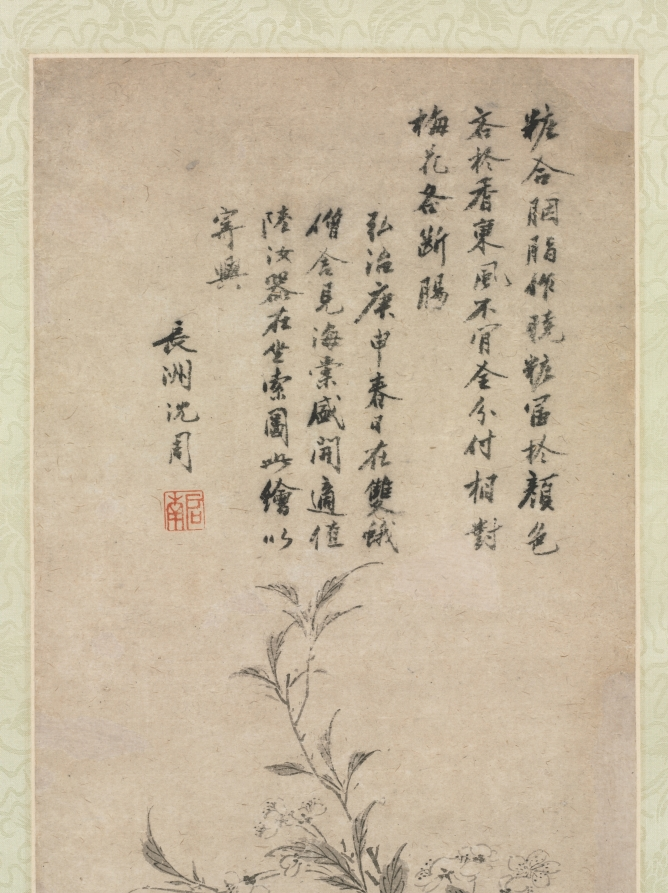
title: Flowering Crab Apple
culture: China, Ming dynasty (1368–1644)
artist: Shen Zhou (Chinese, 1427–1509)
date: 1500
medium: hanging scroll, ink on paper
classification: Painting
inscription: 粧[粉]合胭脂作曉粧，富於顔色吝於香。 東風不肯全分付，相對梅花各斷腸。 弘治庚申春日, 在雙蛾僧舍見海棠盛開, 適值陸汝器在坐索圖, 此繪以寄興。 長洲沈周 [印]啟南; 石田; 白石翁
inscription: 1 additional seal of Wu Yun 吳雲 (1811-1883).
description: Shen Zhou painted a broken branch (zhezhi 折枝) of crab apple, a fragment of nature rather than the full plant in its natural context. Shen uses calligraphic outlines in pure ink to depict the flower petals. The swift yet precise brushstrokes together with the slight S-shaped branch convey vitality. The inscription is a poem written by the artist, commenting on the lovely color and melancholic aura of the crab apple blossom. Shen Zhou is the founder of the Wu School, a group of scholars and officials active around Suzhou in eastern China, known for practicing painting and calligraphy in a refined and elegant style.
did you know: Shen Zhou painted this is an informal and rapidly done presentation picture when he was 74 years old.